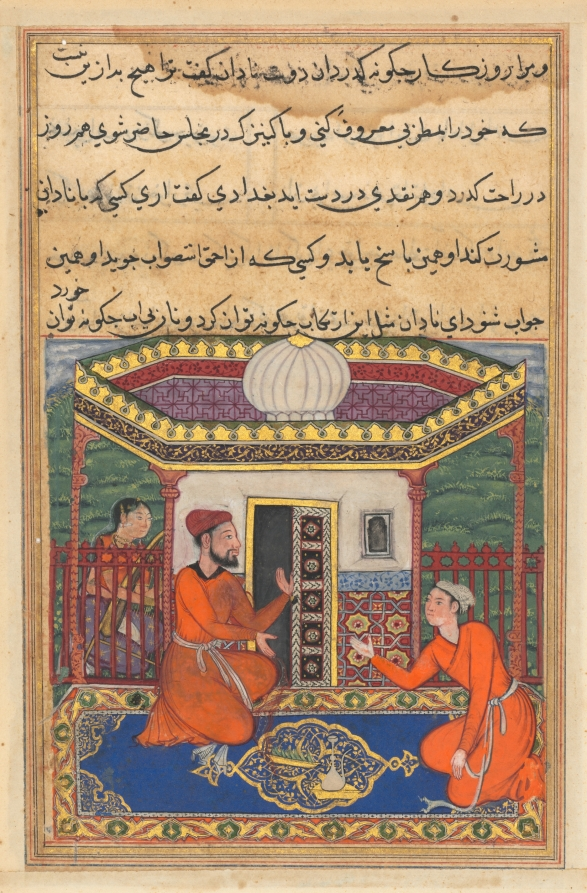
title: The young man of Baghdad solicits advice from a friend as his slave girl, who is adept at music, awaits, from a Tuti-nama (Tales of a Parrot): Forty-eighth Night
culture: Mughal India, court of Akbar (reigned 1556–1605)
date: c. 1560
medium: gum tempera, ink, and gold on paper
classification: Painting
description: The young man, on the right, shares his problem with his friend. His lover, the slave girl, waits in the background, harp in hand. The man has squandered his riches and now seeks a way to earn them back. His friend suggests that he should become a musician and entertain nobility. Finding this advice degrading, the young man declines and decides to sell the girl.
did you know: The girl’s left eye extends beyond the contours of her face, and she wears an ivory plug earring; both are common features of pre-Mughal painting.